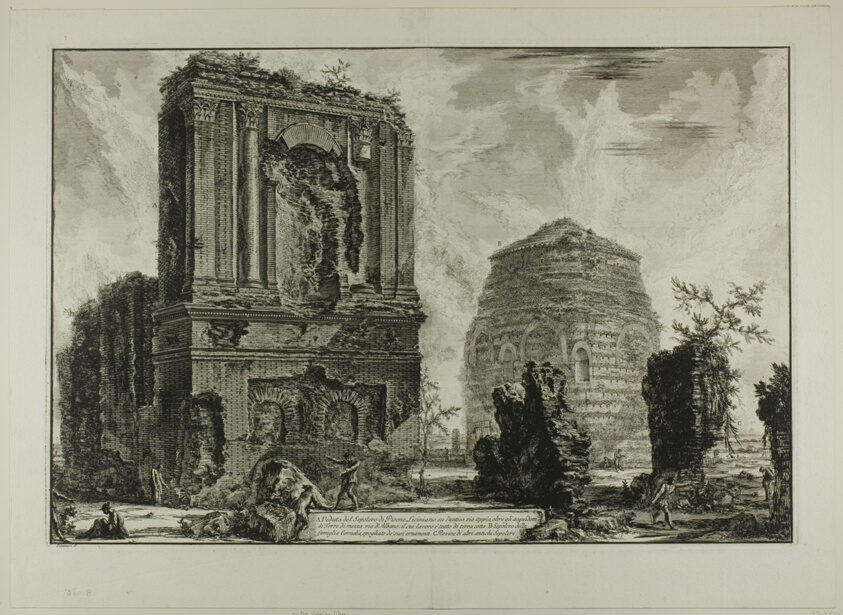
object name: Print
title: A. View of the Tomb of Licinianus Piso on the ancient Appian Way... B. Tomb of the Cornelii..., from Views of Rome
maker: Giovanni Battista Piranesi (Italian, 1720-1778); published by Francesco (Italian, 1758-1810) and Pietro Piranesi (Italian, born 1758/9)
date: 1764, published 1800–07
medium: Etching on heavy ivory laid paper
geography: Italy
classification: etching; print; prints and drawing